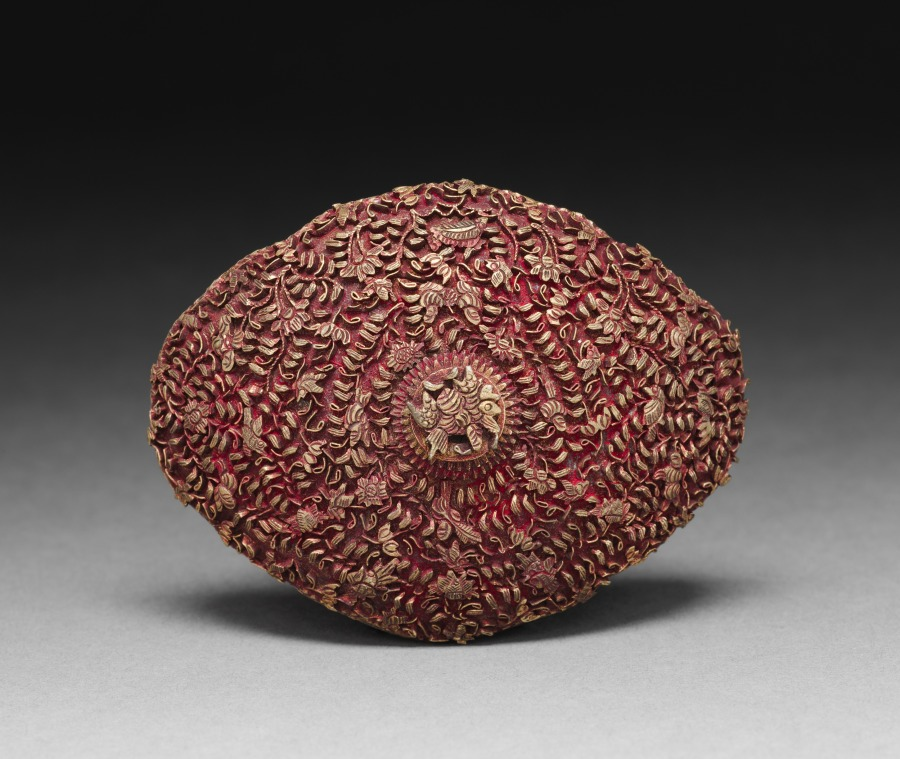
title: Medallion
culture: Siam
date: 1800s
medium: silver and cloisonné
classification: Jewelry